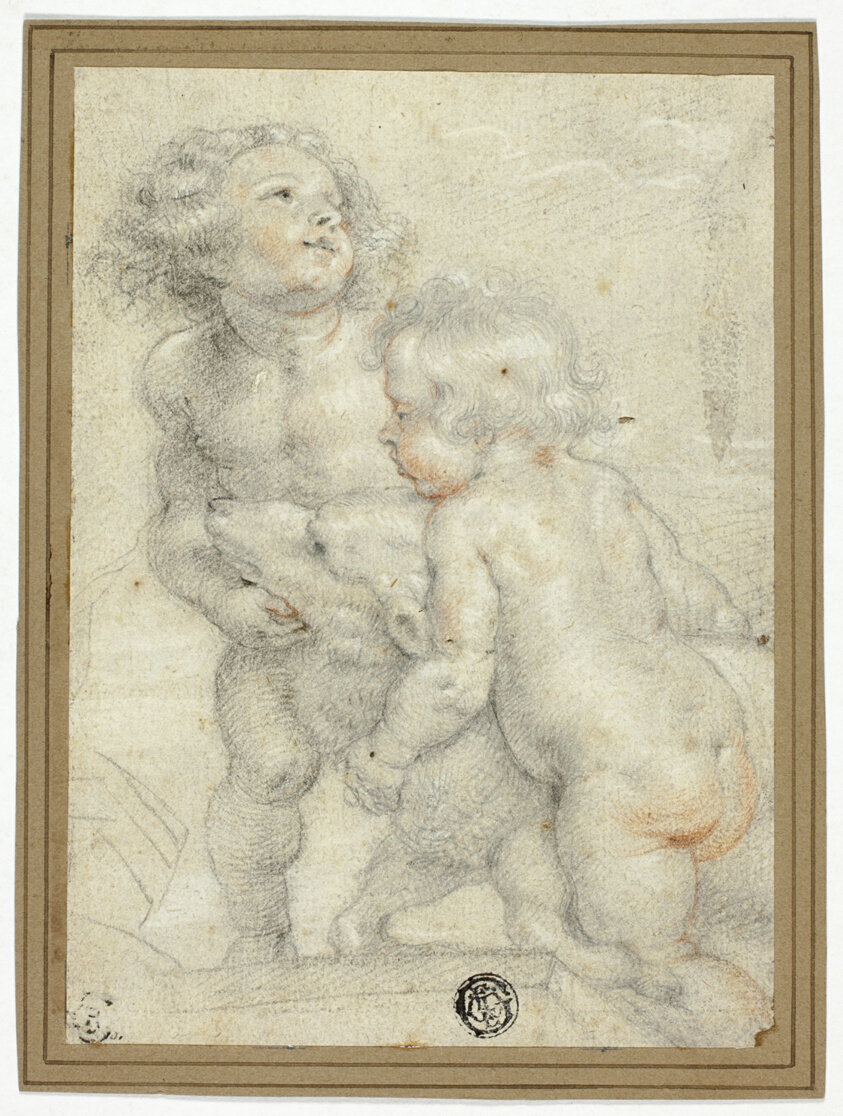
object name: Drawing and Watercolor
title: Two Putti with Lamb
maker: After Peter Paul Rubens; Flemish, 1577-1640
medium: Black chalk and graphite, heightened with red chalk and traces of white chalk, on ivory laid paper, edge mounted on brown wove paper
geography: Flanders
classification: graphite; drawings (visual works); prints and drawing